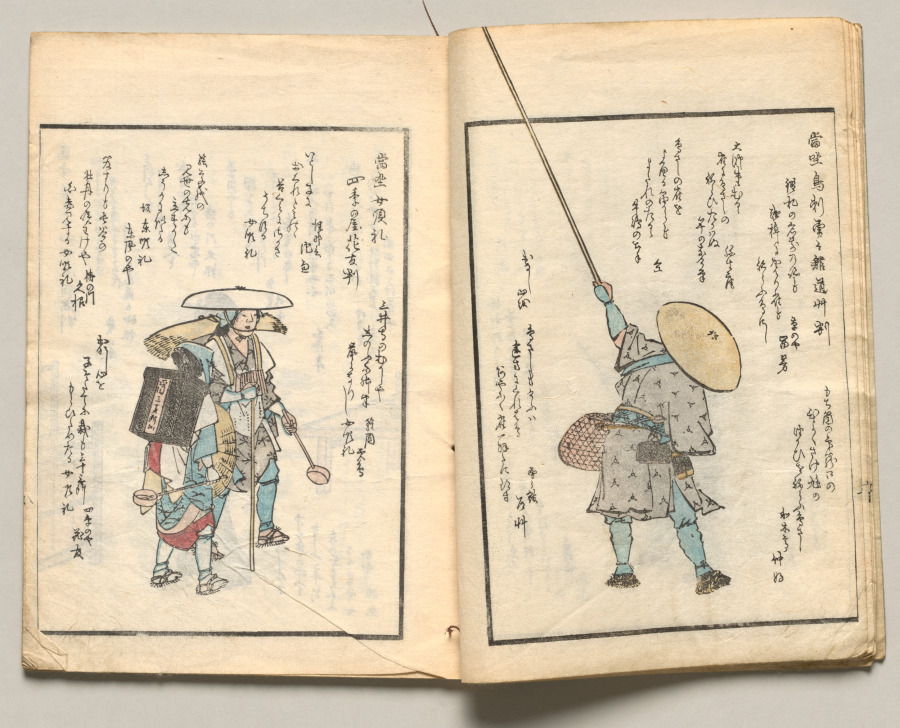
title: Spread Eight from Volume Four of People of Japan in Light Verse (Kyōka)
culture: Japan, Edo period (1615–1868)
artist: Utagawa Hiroshige (Japanese, 1797–1858)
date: 1857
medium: Woodblock-printed book; ink and color on paper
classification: Bound Volume